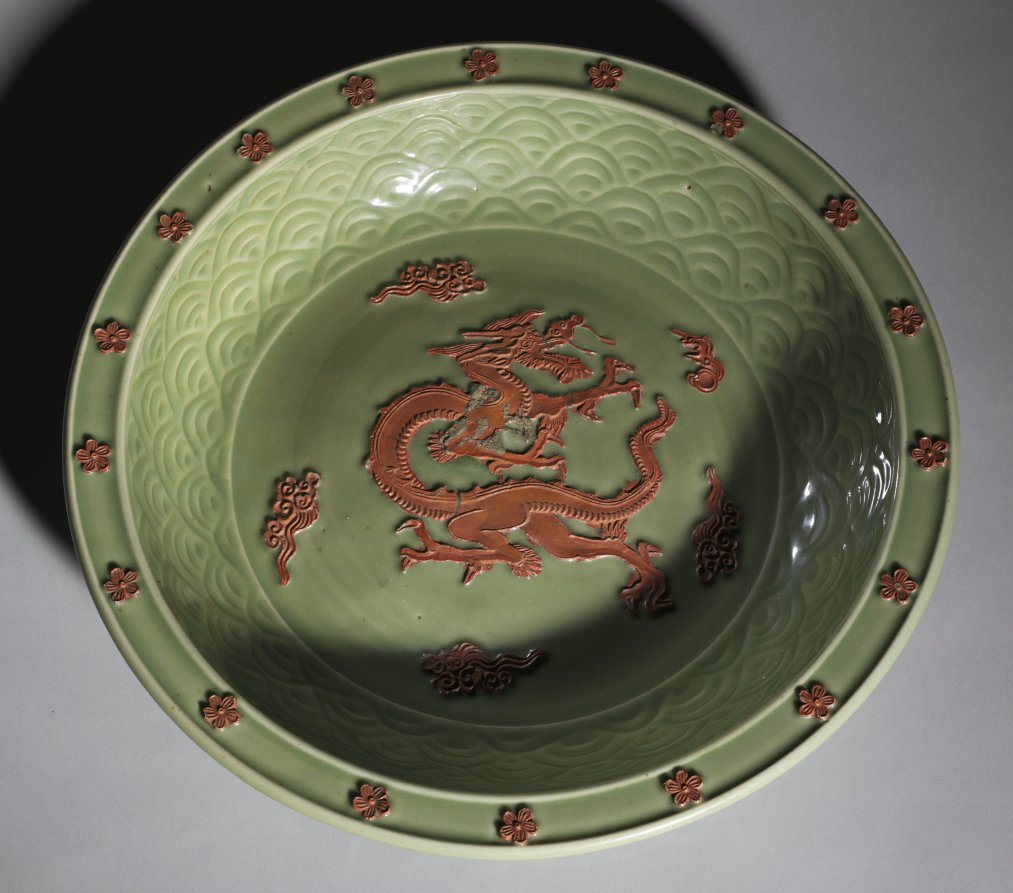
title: Plate with Relief Dragon among Clouds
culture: China, Zhejiang province, Longquan region, Yuan dynasty (1271-1368)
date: 1300s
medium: porcelaneous stoneware with celadon glaze and molded decoration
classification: Ceramic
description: In the center of this plate a majestic coiled dragon is surrounded by clouds, a wave pattern, and five-petaled rosettes around the rim. In front of the dragon's mouth is a flaming pearl, a symbol often associated with dragons from this time. The plate achieves distinctive visual contrasts with green glaze and brown, and its main decorative motifs are raised.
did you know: In front of the dragon's mouth is a flaming pearl, a symbol often associated with dragons from this time.